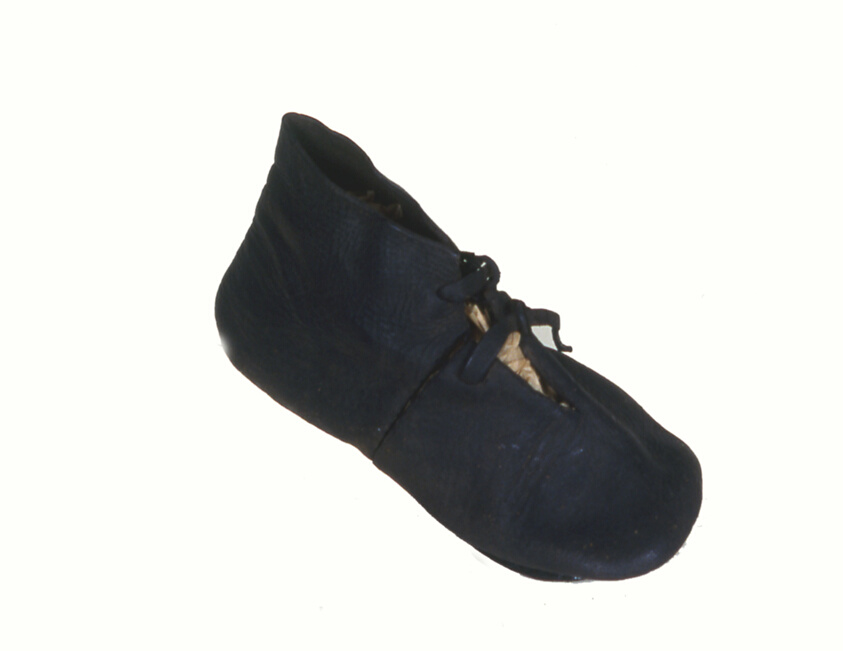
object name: Textile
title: Boot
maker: England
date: 17th century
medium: Leather with metal buckles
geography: England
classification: textile; costume accessory - shoe; shoes - misc